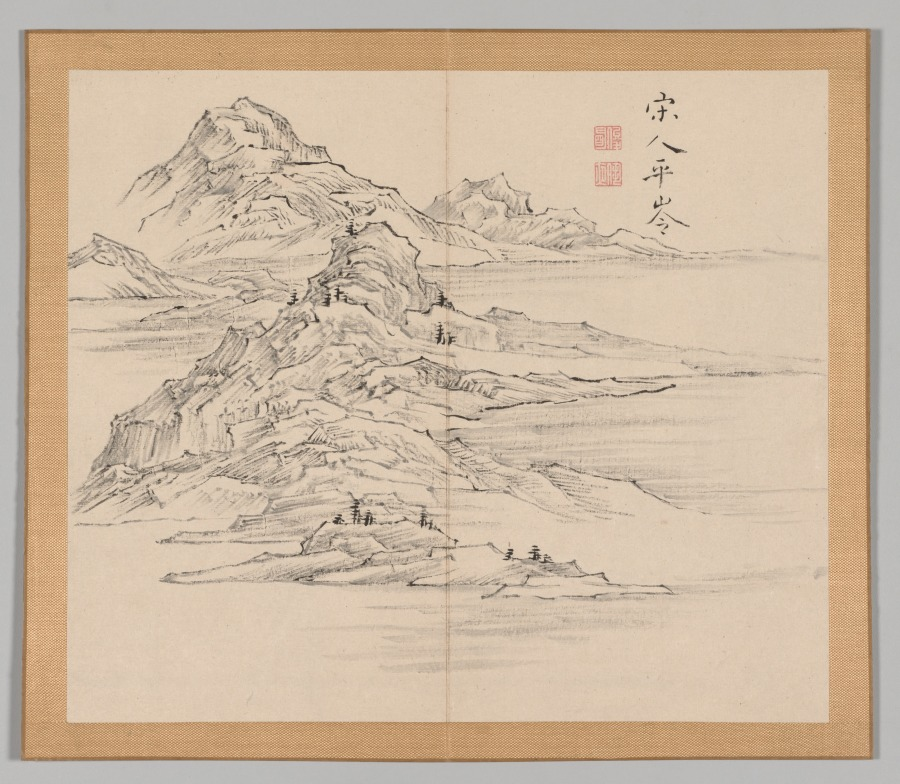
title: Reverberations of Taiga, Volume 1 (leaf 35)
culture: Japan, Edo period (1615–1868)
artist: Aoki Shukuya (Japanese, d. 1802)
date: mid- to late 1700s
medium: double-leaf from a pair of albums; ink and light color on paper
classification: Portfolio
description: Traditionally, young painters in Japan began their studies with an established master-painter. The master's compositions invariably became models that the apprentice copied to learn various ink and brush techniques. Shukuya was a pupil of the famous Kyoto artist Ikeno Taiga, whose style is reflected in these sketches of rocks, trees, and mountains.